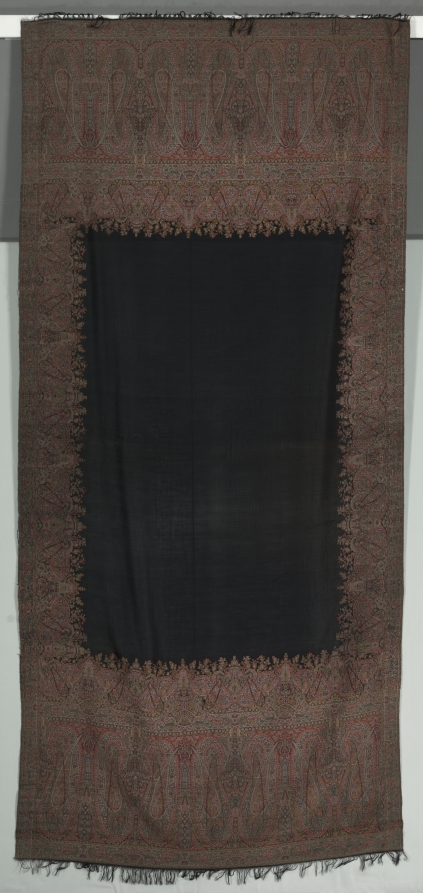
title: Long Shawl with Galleries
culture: France, Paris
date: 1830–35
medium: wool?; supplementary weft pattern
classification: Textile